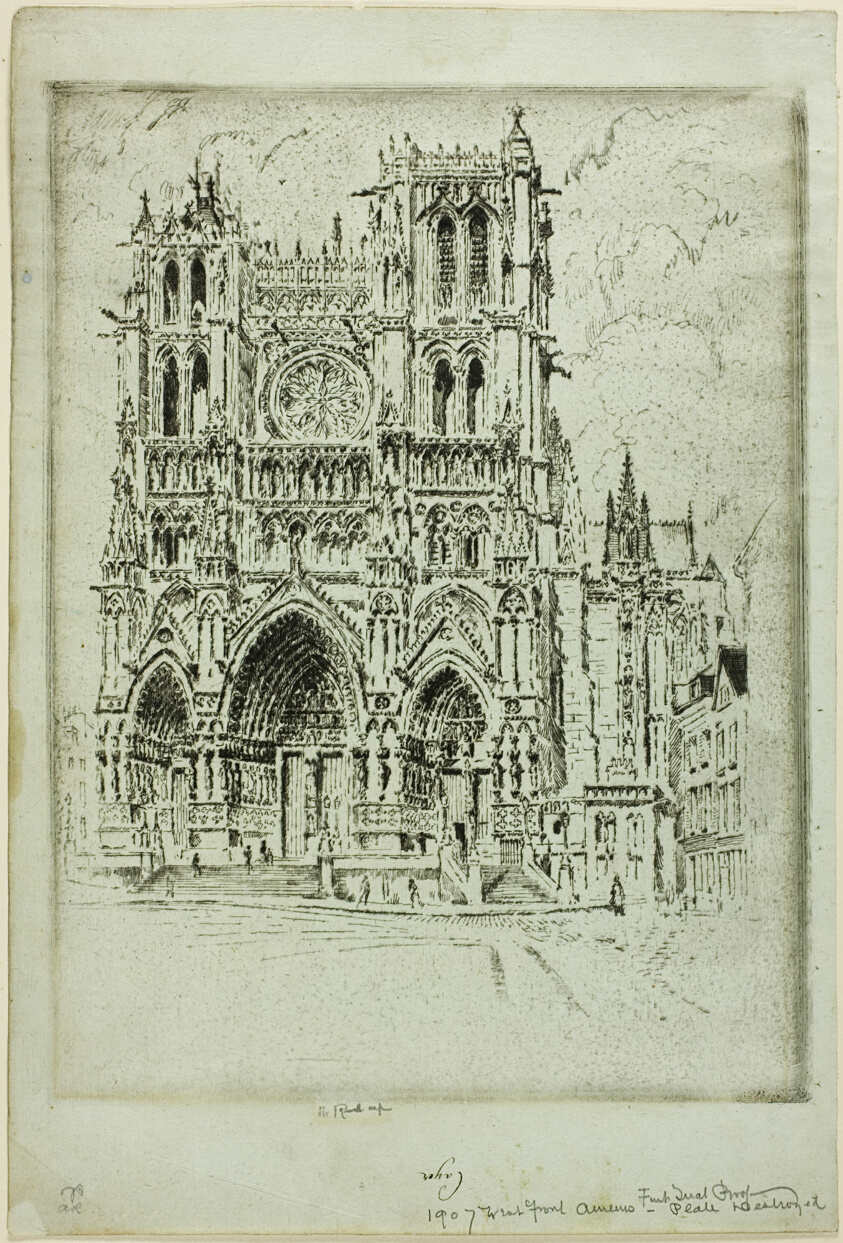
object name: Print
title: The West Front, Amiens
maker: Joseph Pennell (American, 1857-1926)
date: 1907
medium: Etching on blue-gray laid paper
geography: United States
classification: etching; print; prints and drawing